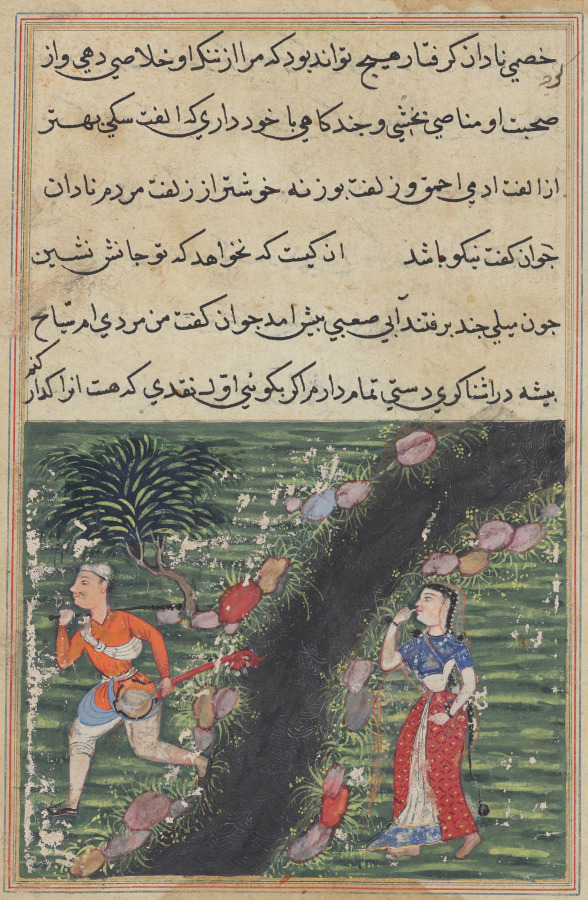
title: The vagabond crosses a stream with the possessions of the daughter-in-law of the king of Banaras and absconds, from a Tuti-nama (Tales of a Parrot): Sixteenth Night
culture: Mughal India, court of Akbar (reigned 1556–1605)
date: c. 1560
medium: gum tempera, ink, and gold on paper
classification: Painting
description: After agreeing to run away with the daughter-in-law of the king of Banaras, the destitute young man realizes that their relationship is unlikely to end happily. He leaves, taking her valuables with him. The woman, now alone on the other side of the stream, bereft of her jewelry, touches her index finger to her mouth in a gesture of shock.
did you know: The stream was painted in silver, which has tarnished.